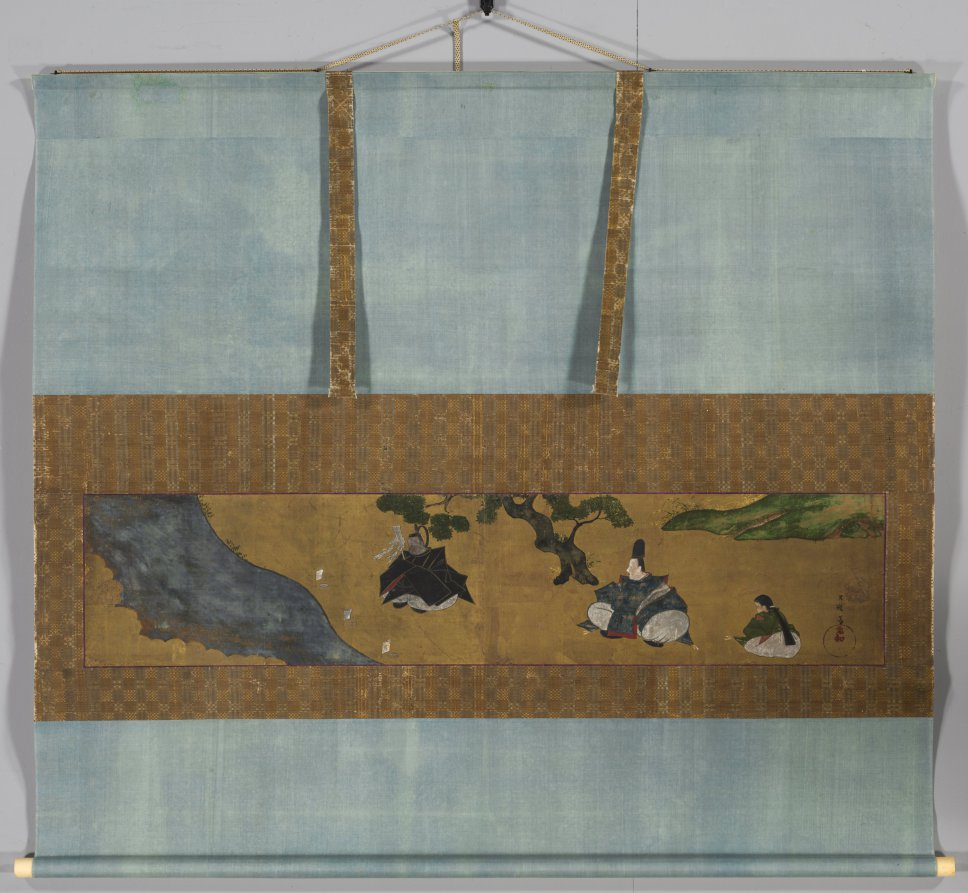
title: Ablution Scene (Misogi)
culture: Japan, Edo period (1615–1868)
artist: Tawaraya Sōri (Japanese, active late 1700s)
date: late 1700s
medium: hanging scroll, ink, color and gold leaf on paper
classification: Painting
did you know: Three clues to this composition’s original format—a pair of doors to a cabinet shelf—are the two circles at either end, the seam down the center, and the size of the image.